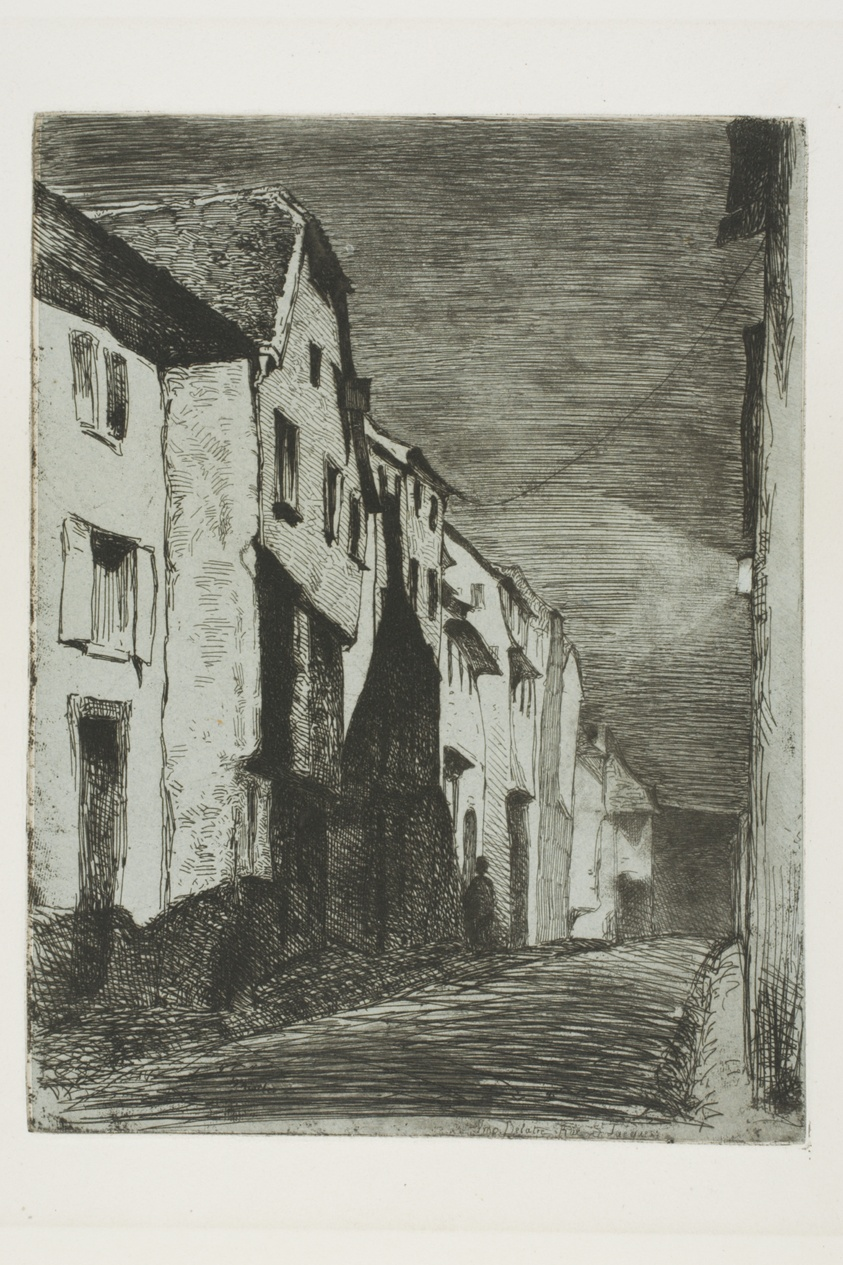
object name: Print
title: Street at Saverne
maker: James McNeill Whistler (American, 1834-1903)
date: 1858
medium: Etching with foul biting in black ink on light blue wove paper laid down on off-white wove paper (chine collé)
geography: United States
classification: etching; foul biting; print; prints and drawing; paper